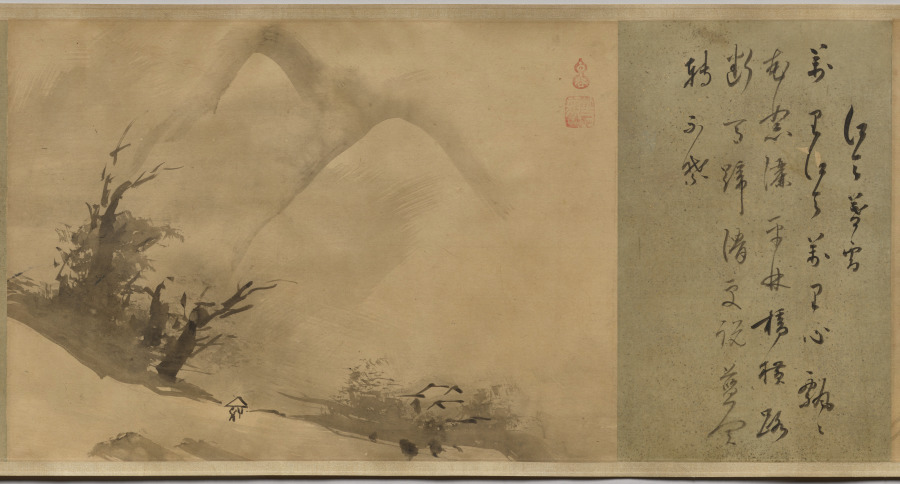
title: Poems and Pictures of the Eight Views of Xiao-Xiang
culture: Japan, Momoyama period (1573–1615)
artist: Unkoku Tōgan (Japanese, 1547–1618)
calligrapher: Inkei Gentetsu (Japanese, 1562–1612)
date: 1605–12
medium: Handscroll; ink on paper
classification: Painting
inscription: Each painting sealed with red gourd-shaped seal reading Unkoku (雲谷) and a square seal reading Tōgan (等顔).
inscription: Each painting prefaced with a titled poem on the Eight Views of Xiao-Xiang by Yujian Ruofen (active late 13th century) inscribed by Japanese Buddhist monk Inkei Gentetsu (1562–1612).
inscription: 右寫玉㵎之筆勢／雪舟末葉等顔筆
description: Unkoku Tōgan brushed these scenes using the splashed-ink technique associated in Japan with the Chinese monk Yujian Ruofen (active late 1200s). Xiao-Xiang refers to the region in present-day Hunan province, where the Xiang River and its tributaries converge. Each of the eight views evokes a time of day or season. The earliest surviving series of Xiao-Xiang paintings is by Wang Hong (active mid-1100s), but textual evidence tells us the theme appears earlier. It was later adopted in Japan and Korea, as seen here. The poems were inscribed by Inkei Gentetsu, the third abbot of the Rinzai Zen temple Tōshunji, Japan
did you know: The “Tō” of Tōgan comes from the name of painter Sesshū Tōyō (1420–1506).